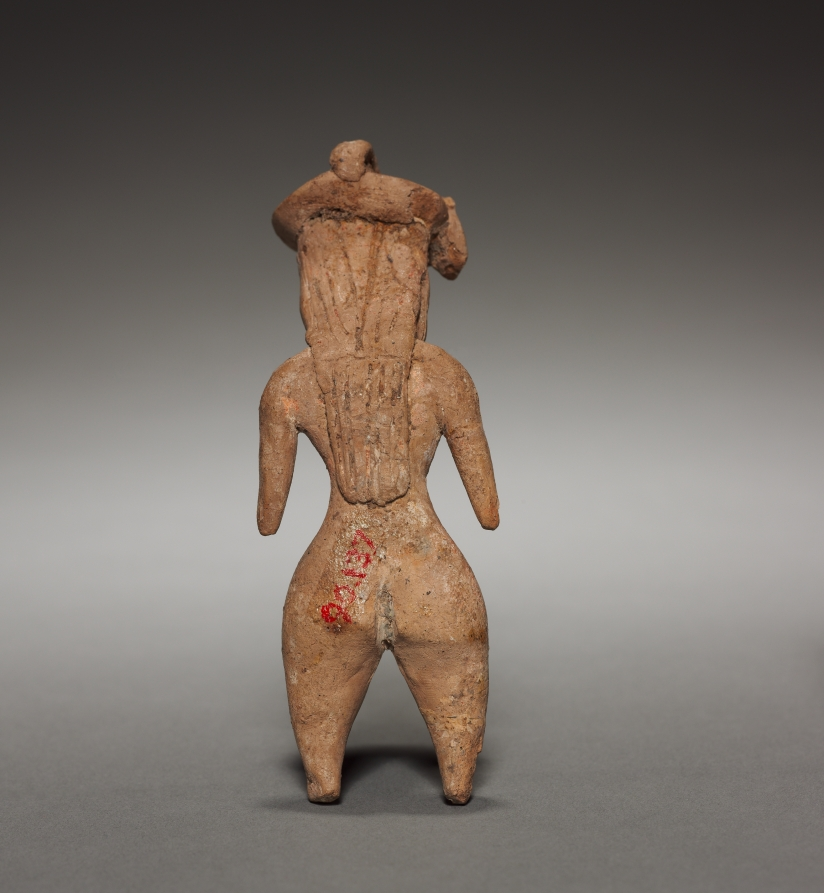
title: Female Figurine with Headdress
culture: Mesoamerica, Central Mexico, Tlatilco, type D1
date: 1200–900 BCE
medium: pottery with traces of white and red pigment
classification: Sculpture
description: This ceramic figurine—in the style of Tlatilco, an early village site in central Mexico—depicts a female with a headdress or hat and long hair that cascades down her back. Since many figurines from the period depict females, modern interpreters usually connect them to fertility concerns. They also seem to testify to the importance of women among early Mesoamerican cultures.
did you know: The figure’s broad thighs may express beauty, or perhaps indicate a life stage.